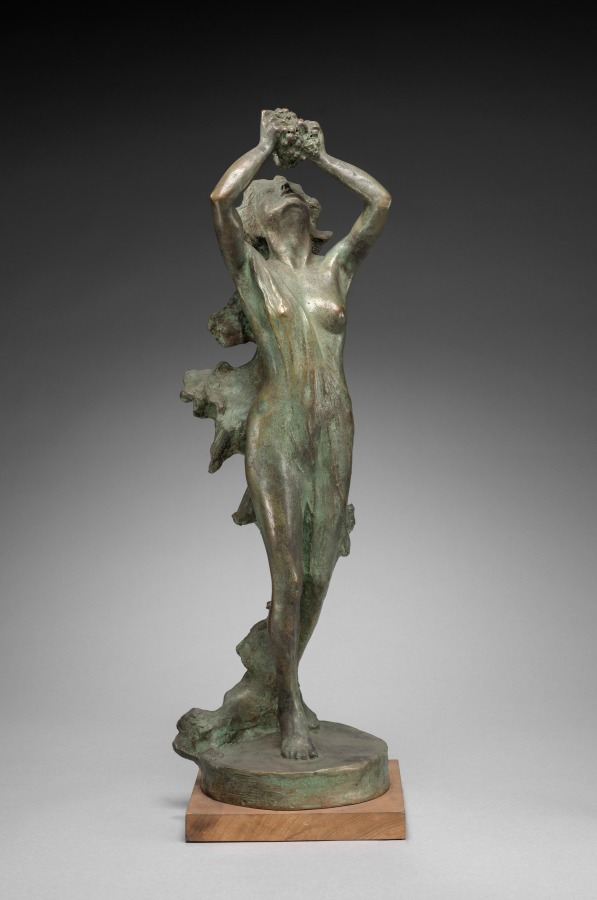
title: Fountain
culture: America, Ohio, Cleveland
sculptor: Jessica Wakem McMurray (American, born England, 1874–1950)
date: 1920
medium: bronze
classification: Sculpture